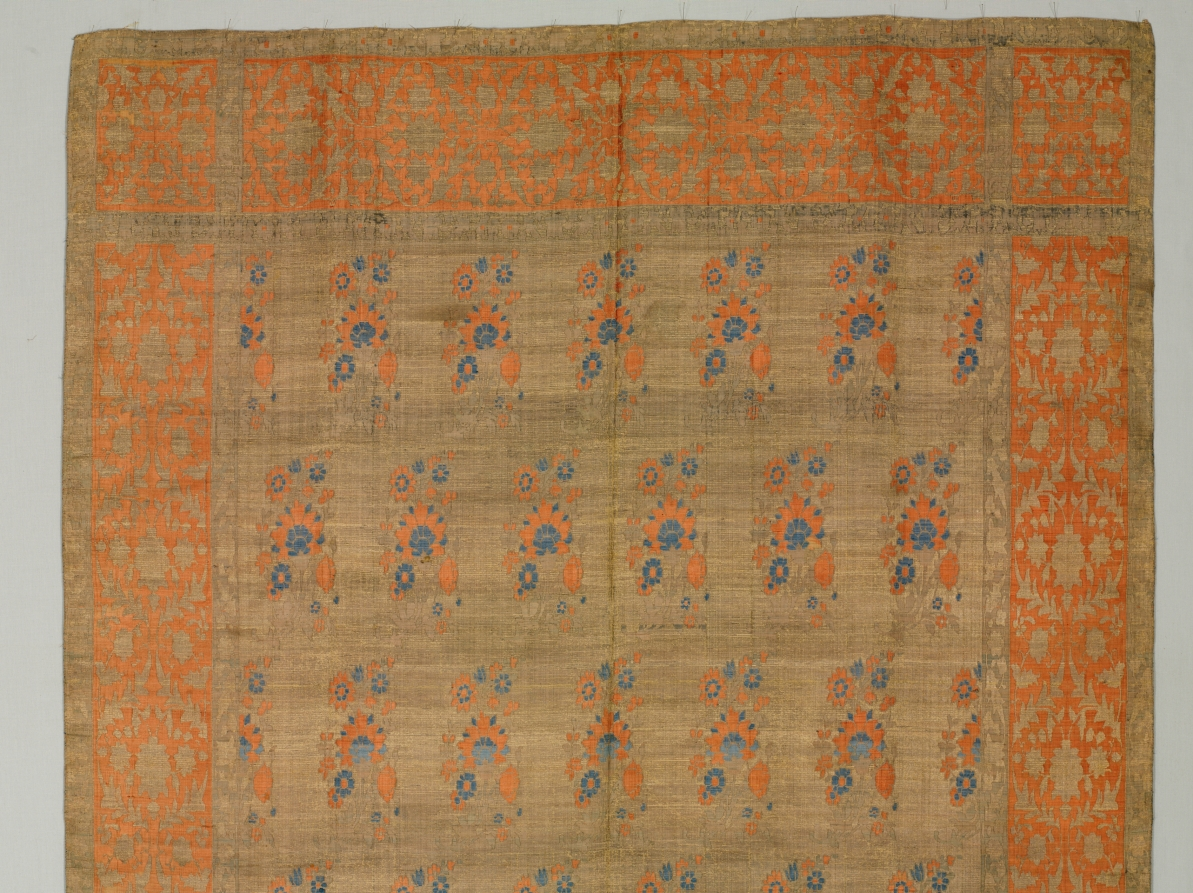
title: Velvet fragment from a palace curtain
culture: Iran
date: 1700s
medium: taquete silk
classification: Textile